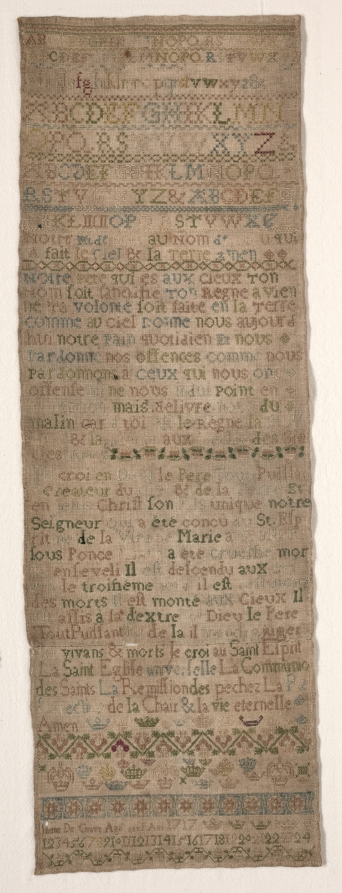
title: Sampler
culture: France, early 18th century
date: 1717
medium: embroidery: silk on linen tabby ground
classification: Sampler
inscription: rows of alphabets above, text containing an Ejaculation, the Lord's Prayer, and the Apostles' Creed, numerals below, signed "Irene De Grave Age neuf ans 1717."